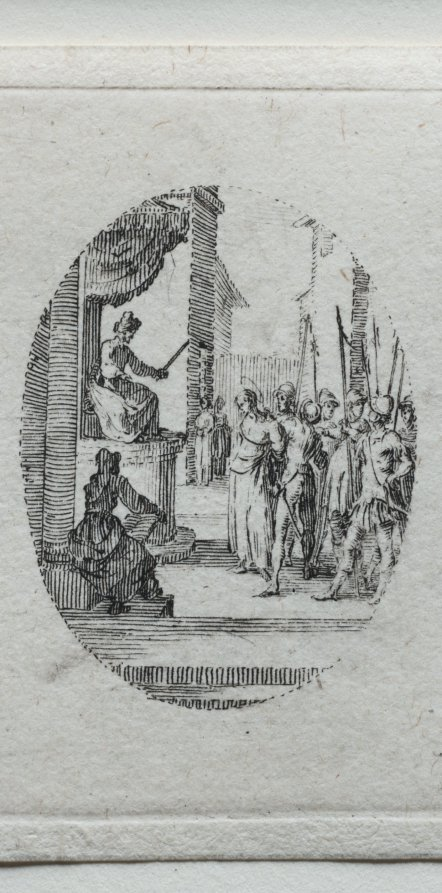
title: The Mysteries of the Passion: Christ before Pilate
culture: France, 17th century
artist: Jacques Callot (French, 1592–1635)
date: 1631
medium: etching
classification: Print